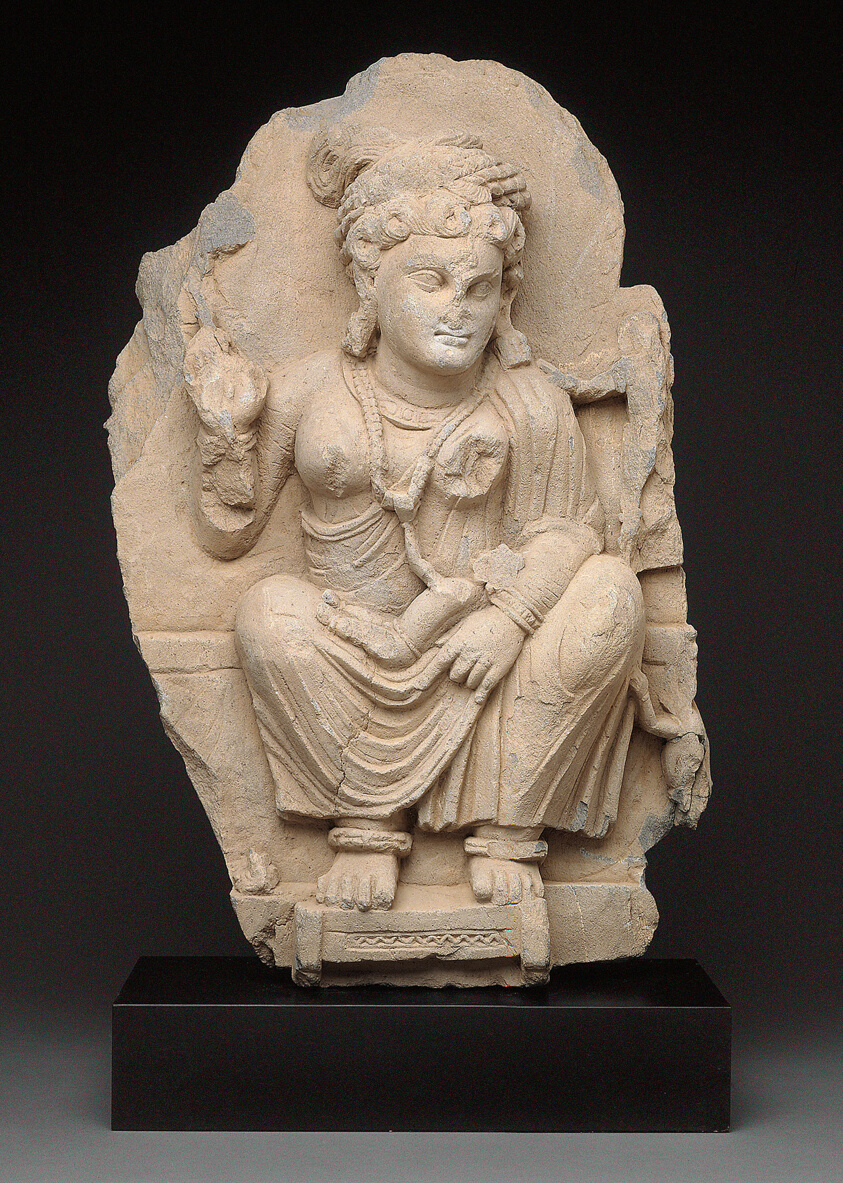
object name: Sculpture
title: Goddess Hariti Seated Holding a Child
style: South Asian, gandharan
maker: Pakistan; Ancient region of Gandhara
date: 2nd/3rd century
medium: Gray schist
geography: Gandhara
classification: schist; stone; sculpture; asian art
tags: goddesses